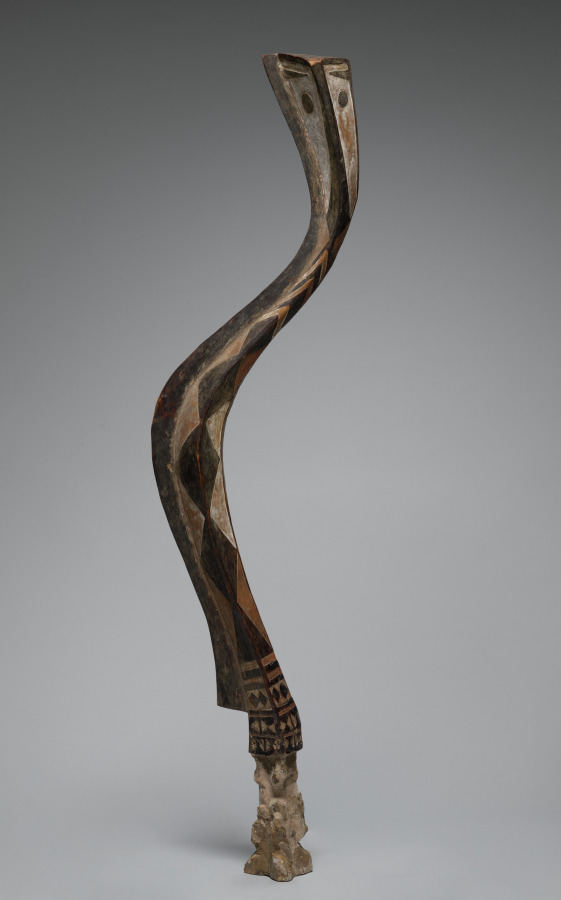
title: Serpent Headdress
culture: Africa, West Africa, Guinea, possibly Baga-style maker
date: late 1800s–early 1900s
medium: Wood (Nauclea pobeguinii) and paint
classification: Mask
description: Traditionally, Baga society was ruled by village councils of elders who derived their power from their direct contact with spirit entities through lifelong initiation rituals and the accumulation of secret knowledge. Two different religious orders controlled initiations, providing the context for much Baga art. One was identified as female, the other as male, though only men belonged to both groups. Initiations in each order followed three stages, culminating in the revelation of the highest spirit being. This type of Baga headdress embodied the serpent spirit Ninkinanka, honored for giving rain, bestowing riches, and bringing forth children. The serpent figure would be placed on top of a conical framework of palm branches carried on a male dancer’s head. It appeared at the end of the first level of the initiation for boys and girls or just before the circumcision at the beginning of the boys’ initiation.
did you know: In the context of boys' initiations, the serpent headdress was sometimes identified as the rainbow, which the Baga and their neighbors associate with beginnings and endings, life and death, and the continuation of lineages.